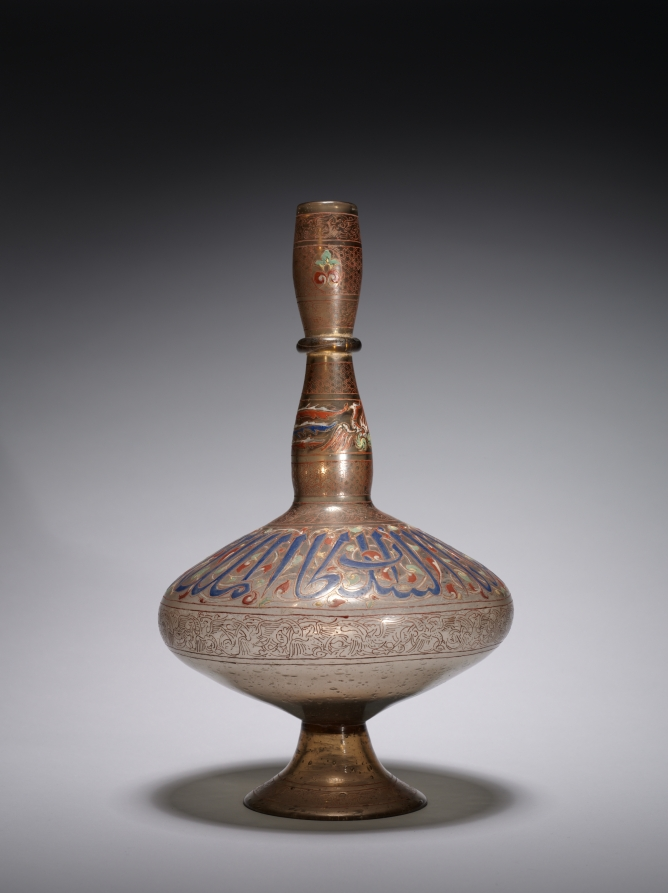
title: Bottle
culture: Europe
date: c. 1900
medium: glass with enameled and gilded decoration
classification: Glass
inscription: The inscription translates: "Glory to our lord, the sultan, the king, the victorious, the protector of the world and the religion, Muhammed."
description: The bold inscription on the body of the bottle translates: “Glory to our lord, the sultan, the king, the victorious, the protector of the world and the religion, Muhammad.” The sultan referred to here is the Mamluk ruler Muhammad ibn Qala’un (1285–1341), who is also referenced on the nearby mosque lamp. This bottle, as with the mosque lamp CMA 1981.10, is representative of reproductions of Mamluk glass that were prominent in the late 1800s in Europe during a period of resurgence of interest in Islamic art. At this time, collectors and artists revived the techniques of enameling and gilding that are hallmarks of Mamluk glass.